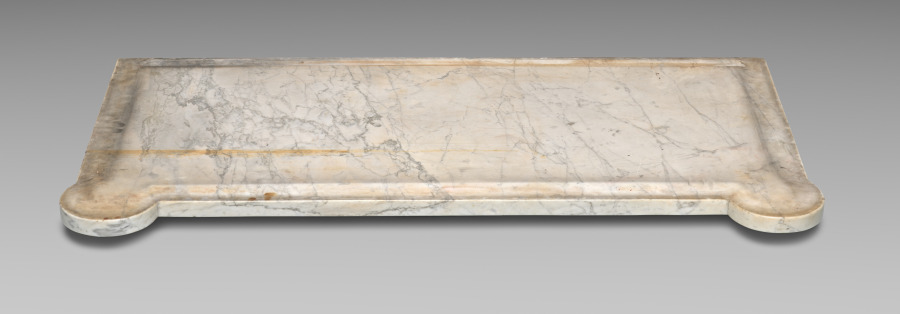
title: Pier Table (marble top)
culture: America, New York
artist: Joseph Meeks and Sons (American)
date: c. 1829–1835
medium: mahogany, marble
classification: Furniture and woodwork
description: Ornamental tables such as this marble-topped example were most often used in rooms on a narrow wall between two windows or just across from them on an opposite wall. Usually a gilded mirror hung above the table to create a single pier of glass, top to bottom, which reflected light around the room. This table’s bold use of carved and stenciled decoration, as well as expensive white marble, indicate that it was owned by a very wealthy family.